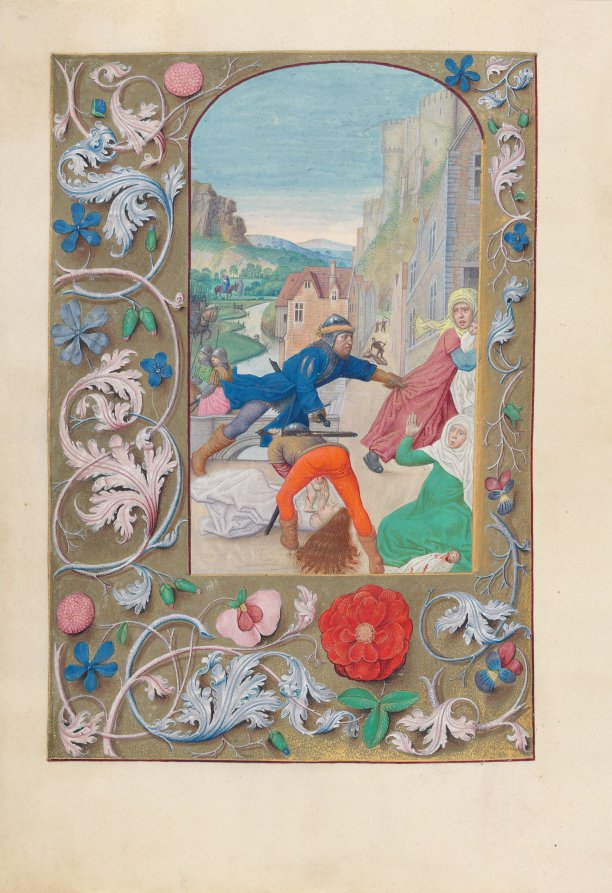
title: Hours of Queen Isabella the Catholic, Queen of Spain: Fol. 146v, Massacre of the Innocents and Flight into Egypt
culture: Flanders, Ghent and Bruges, late 15th century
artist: Master of the First Prayerbook of Maximillian (Flemish, c. 1444–1519)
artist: and Associates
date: c. 1500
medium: ink, tempera, and gold on vellum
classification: Bound Volume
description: This manuscript was illuminated by a circle of at least five highly organized manuscript painters active in the Flemish cities of Ghent and Bruges. The principal illuminator was Alexander Bening, who painted the majority of the book's miniatures. Manuscripts produced by this circle of artists are renowned for the decoration of their borders, which typically feature a rich variety of realistically-painted flowers, birds, and butterflies. This prayer book, called a book of hours, was intended not for a cleric, but for the private devotions of a lay person-in this case, Isabella the Catholic, Queen of Spain (1451-1504). Isabella's coat of arms embellishes the book's frontispiece. It is unlikely that the book was commissioned by the Queen herself; rather, she probably received it as a diplomatic gift from someone courting her patronage, perhaps Cardinal Francisco Jimenez de Cisneros. A Franciscan friar, Jimenez was dependent upon Isabella for his advancement, first to the post of Queen's confessor in 1492, and then to Archbishop of Toledo in 1495.